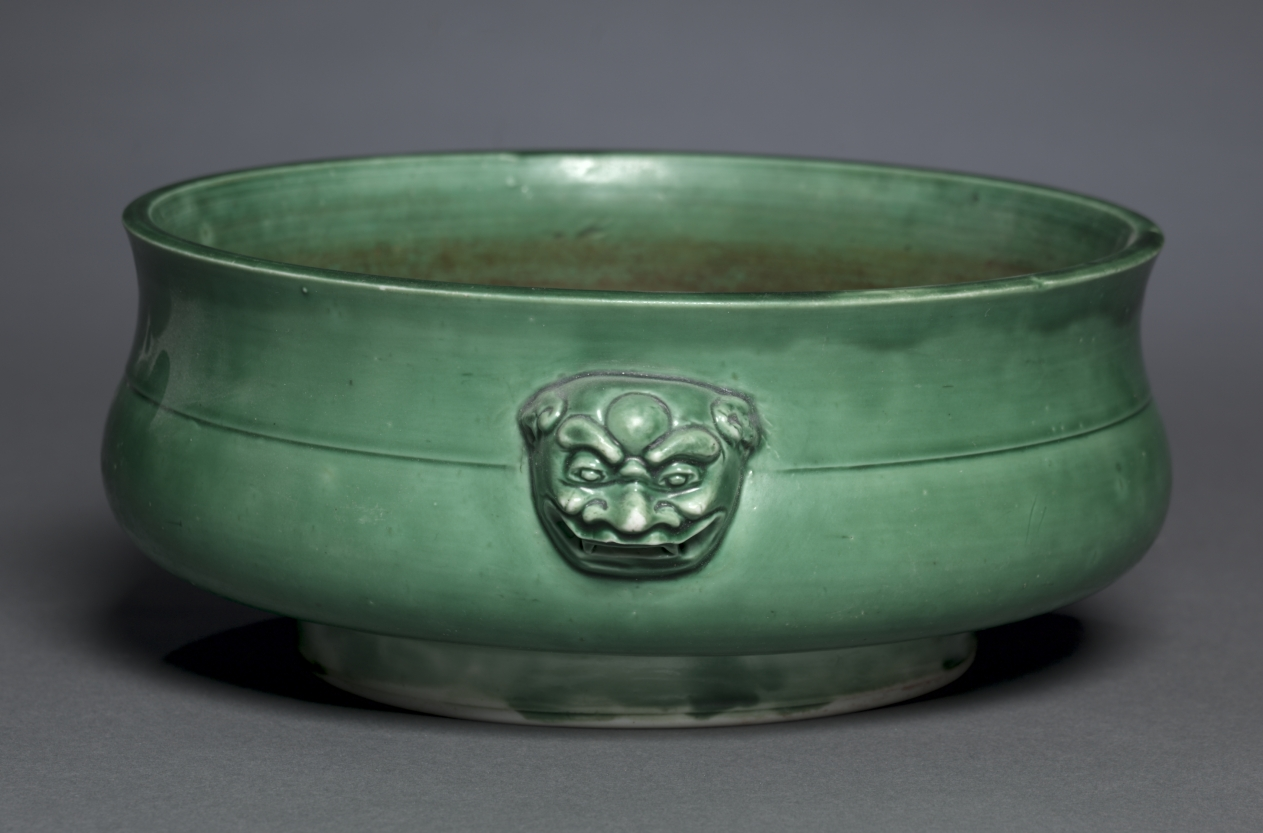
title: Bowl in Form of Archaic Gui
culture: China, Jiangxi province, Jingdezhen, Ming dynasty (1368-1644), Chongzhen reign (1628-44) or Qing dynasty, Shunzhi reign (1644-61), but Ming dynasty (1368-1644), Jiajing mark (1522-66)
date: 1628–61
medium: porcelain with camellia-leaf green glaze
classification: Ceramic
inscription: 大明嘉靖年製